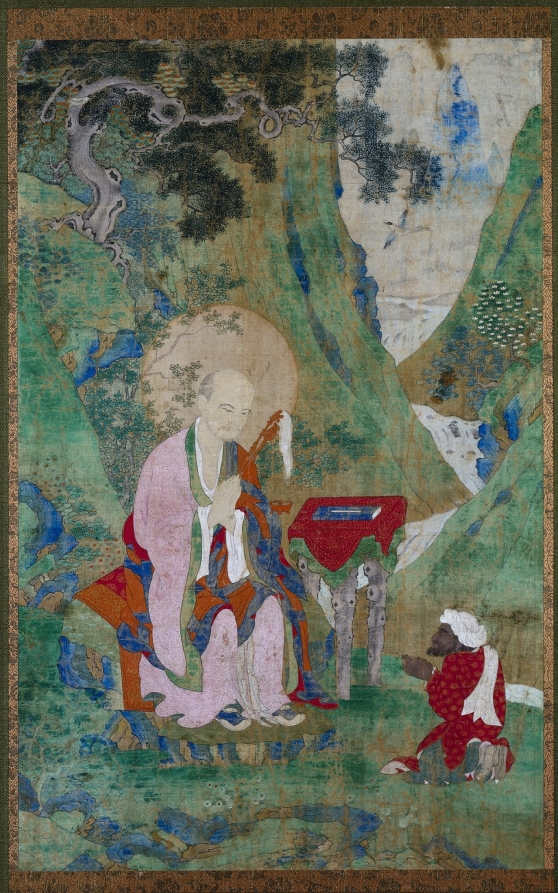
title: Lohan (Immortal)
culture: Tibet, Sino-Tibetan style, 17th century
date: 1600s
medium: ink and slight color on cotton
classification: Painting